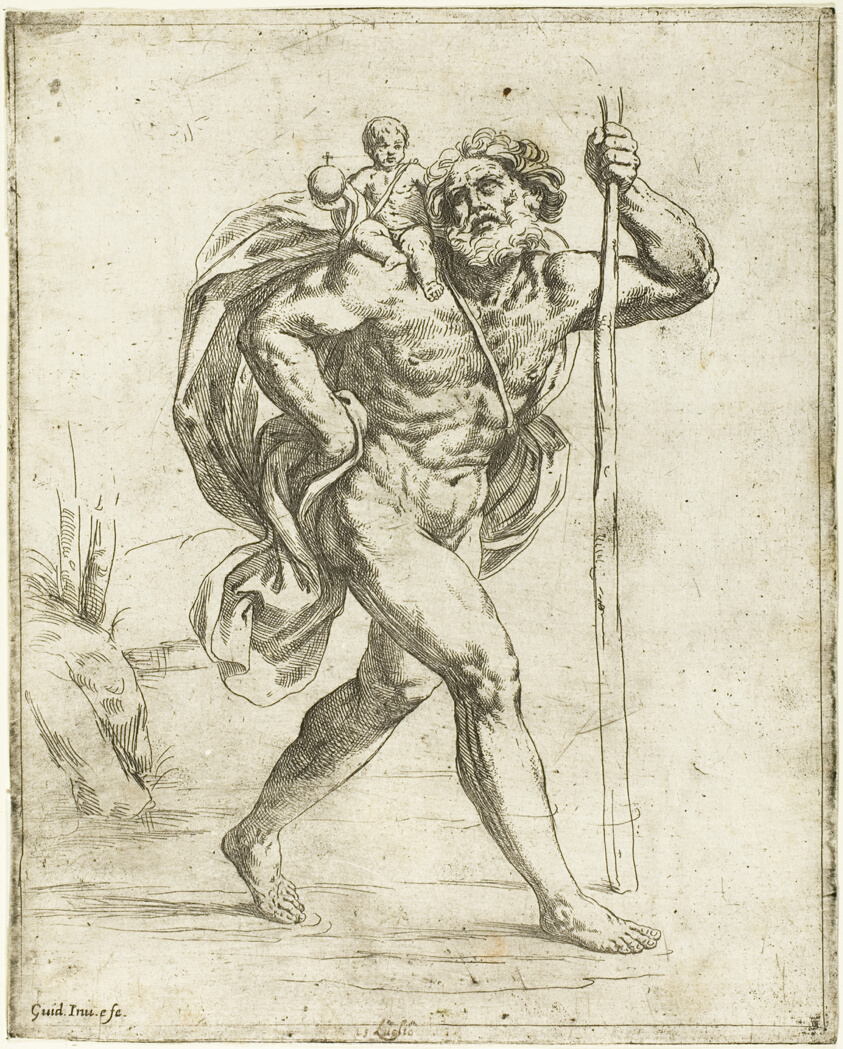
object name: Print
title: Saint Christopher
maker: Guido Reni (Italian, 1575-1642)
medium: Etching on paper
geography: Italy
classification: etching; print; prints and drawing